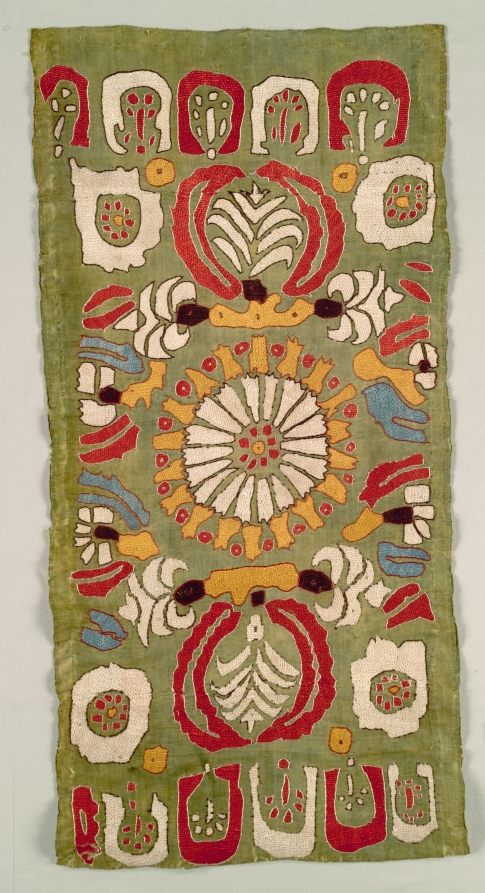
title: Cushion Cover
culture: Turkey, 18th century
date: 18th century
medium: embroidered twill weave silk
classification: Embroidery